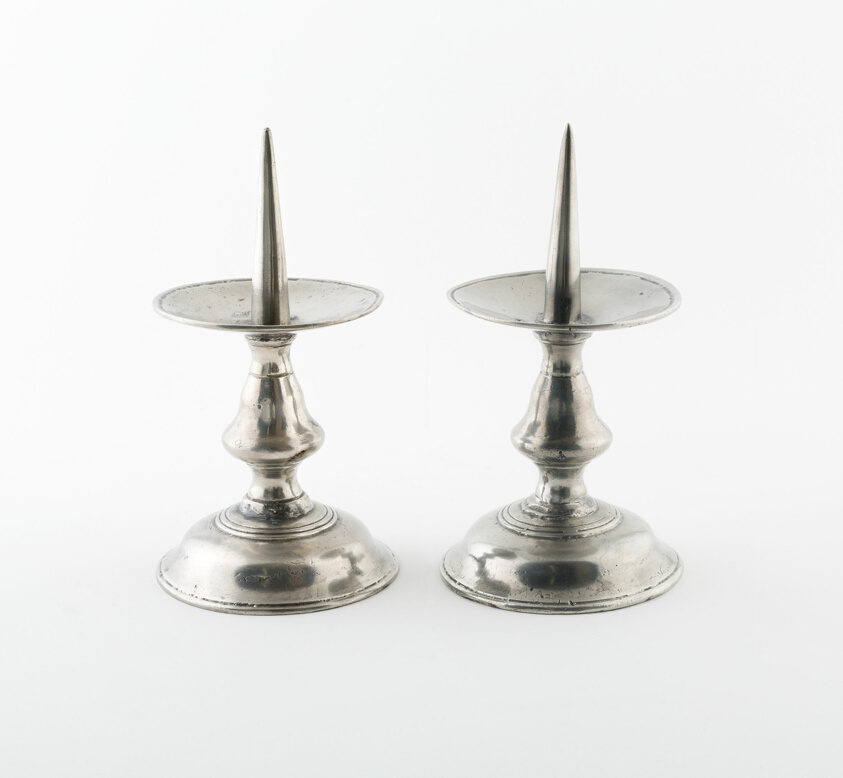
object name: Metalwork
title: Pricket Candlestick (One of a Pair)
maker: Probably Germany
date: 17th century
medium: Pewter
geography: Germany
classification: candleholder - candlestick; candleholder; pewter; metalwork; european decorative arts